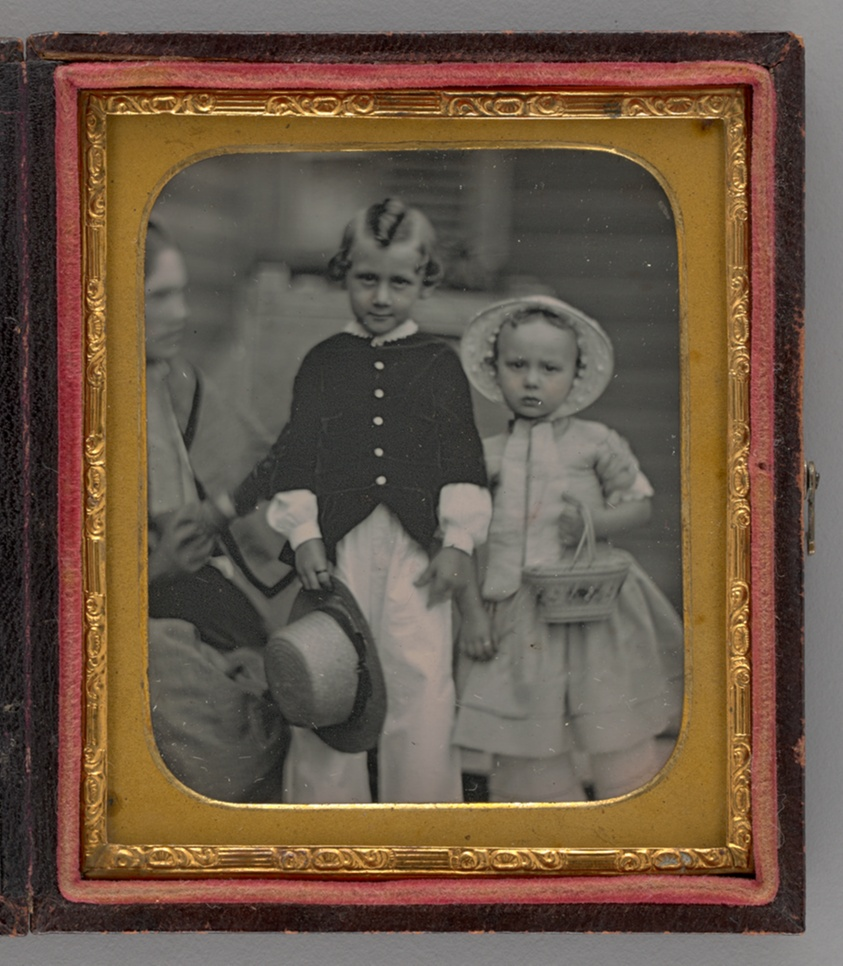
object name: Photograph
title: Untitled (Portrait of a Boy and Girl)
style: 19th century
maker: Unknown maker; American, 19th century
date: 1855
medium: Daguerreotype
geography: United States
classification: portrait; photograph; photographic process; photography; portrait; daguerreotype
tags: lundberg collection, portraits, portraits: child subject